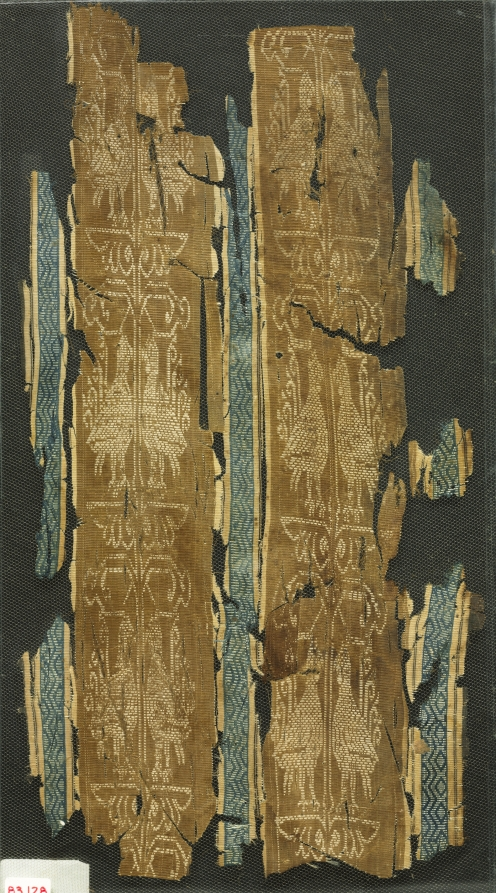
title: Silk fragment with striped pattern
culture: Syria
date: 900s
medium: plain weave variation with supplementary weft: silk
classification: Textile